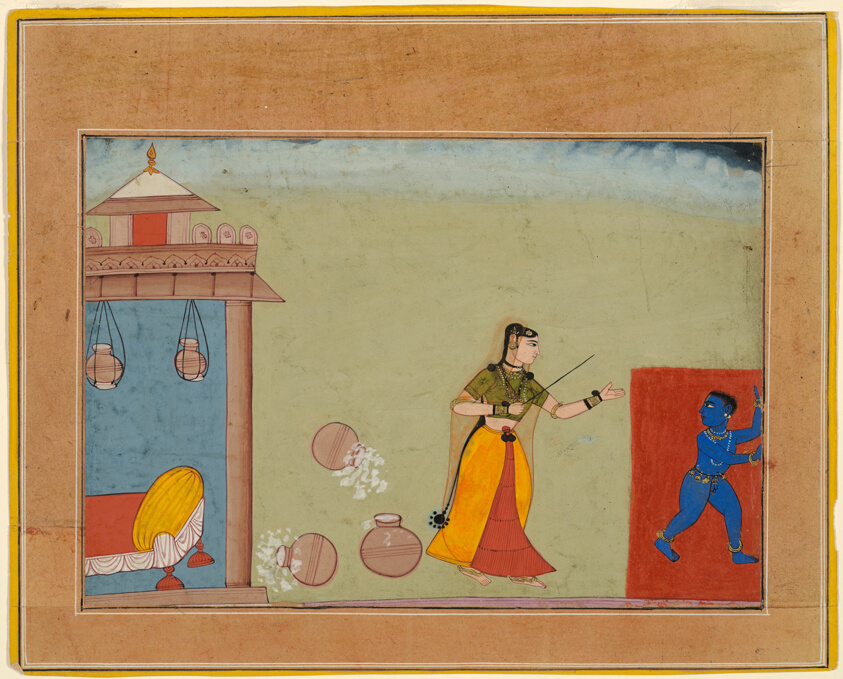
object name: Painting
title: Yashoda Chastises Her Foster Son, the Youthful Krishna, page from a manuscript of the Bhagavata Purana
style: South Asian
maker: India; Rajasthan, Bikaner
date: c. 1600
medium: Opaque watercolor on paper heightened with gold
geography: India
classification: watercolor; painting